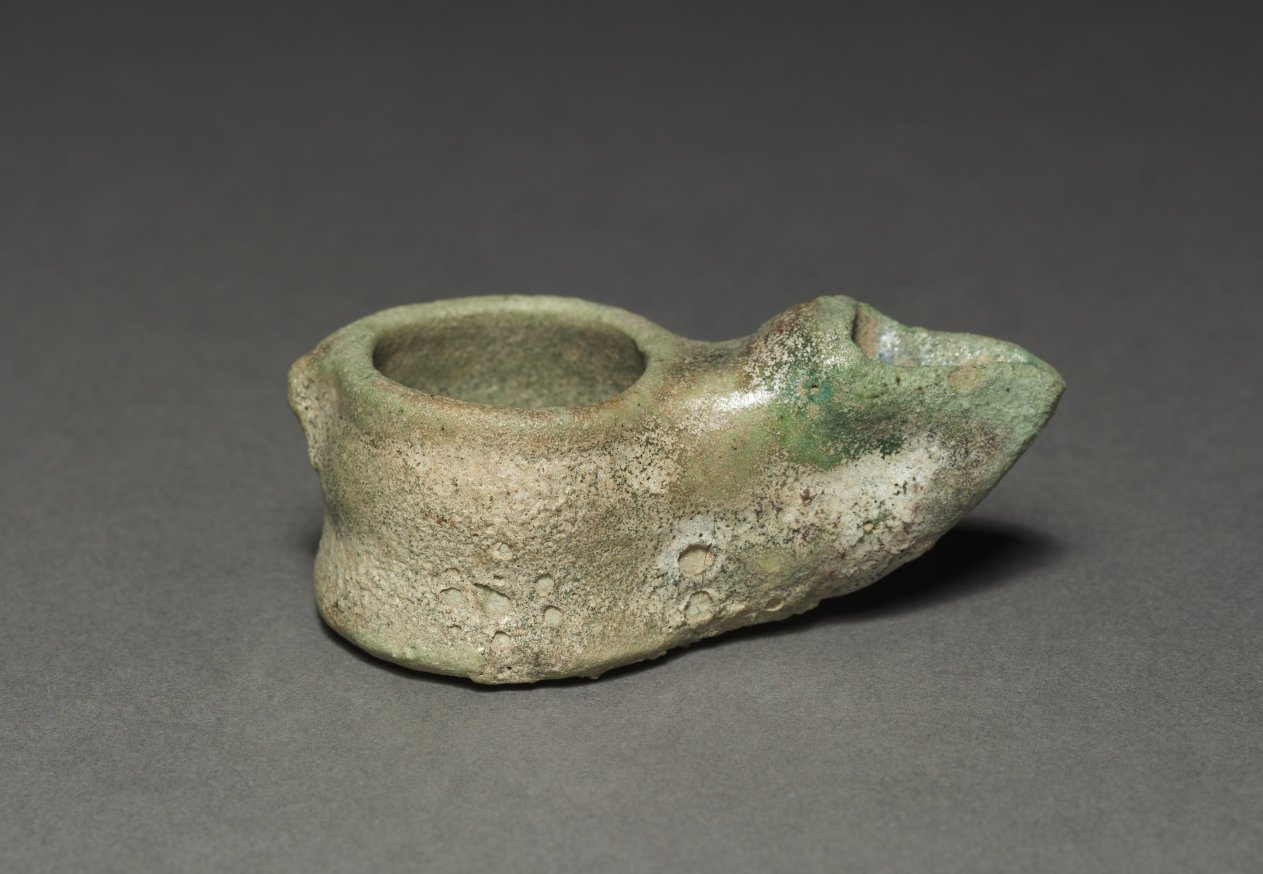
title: Lamp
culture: Parthian Empire (247 BCE–224 CE)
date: 1–200 CE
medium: terracotta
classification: Ceramic